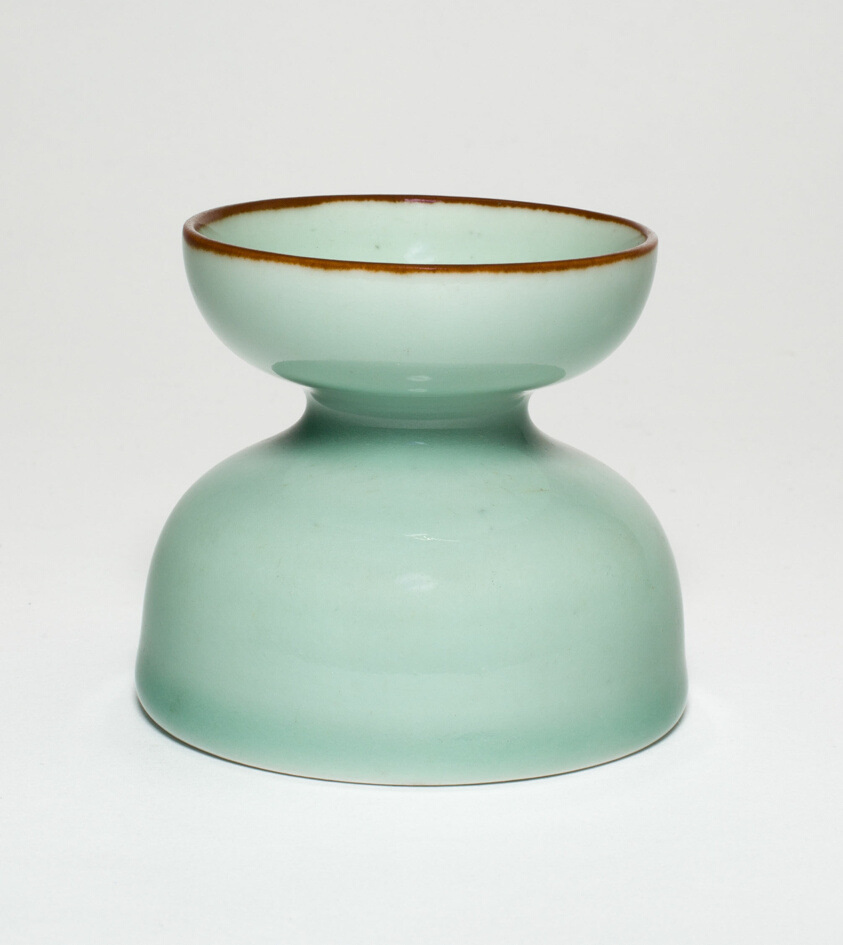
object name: Vessel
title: Waisted Water Bottle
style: Chinese (culture or style)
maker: China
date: Qing dynasty (1644–1911), 18th/19th century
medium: Celadon-glazed porcelain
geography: China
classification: porcelain; asian art; ceramics; vessel